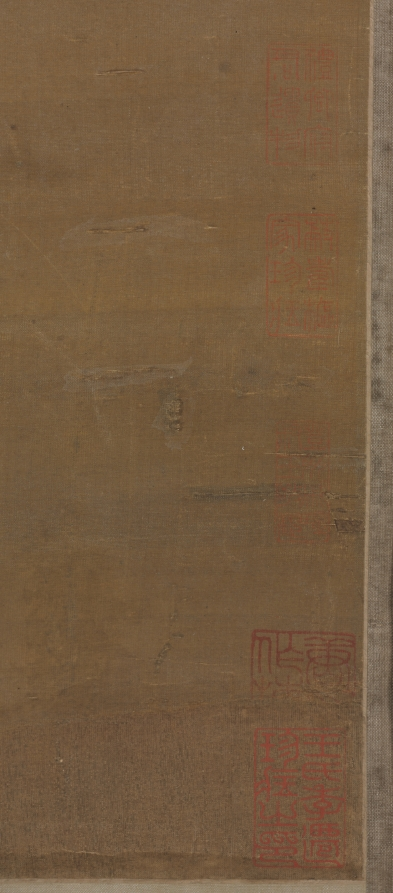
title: Xu Jingyang Moving His Family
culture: China, Ming dynasty (1368–1644)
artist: Cui Zizhong (Chinese, 1574–1644)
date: 1644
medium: Hanging scroll; ink and color on silk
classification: Painting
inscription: Artist's 2 seals: Pei-hai, Cui Zizhong yin.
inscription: 9 additional seals: 2 of Xiang Yuan (18th-19th c.); 1 of Tang Zuomei (late 18th-19th c.); 1 of Zhang Heng 張珩 (1915-1963); 1 of C. C. Wang 王季遷 (1907–2003); 4 unidentified.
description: Xu Jingyang was a dedicated fourth-century Confucian official who allegedly turned into a Daoist immortal. This scroll depicts the legend that when he attained immortality, he took his entire household, including chickens and dogs, to paradise. Cui Zizhong’s painting style intentionally referenced ancient masters. Typical of the pre-Song dynasty landscape tradition, there is the use of blue and green colors and an emphasis on outline rather than texture. While the trembling outlines are reminiscent of earlier painters, the flickering light on rocks and trees is a stylistic feature of Cui’s own time.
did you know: Xu Jingyang, wearing red, is in the upper register of figures, while below his servants transport a rooster, dog, and other supplies.